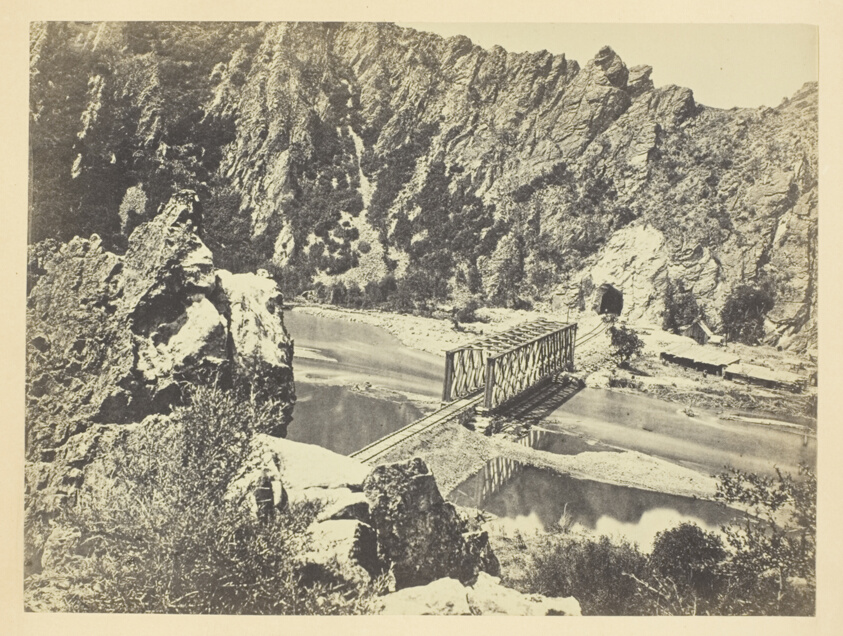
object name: Photograph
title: Tunnel No. 3, Weber Canon, Utah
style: 19th century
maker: Andrew J. Russell; American, 1830–1902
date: 1868/69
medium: Albumen print, pl. XXII from the album "Sun Pictures of Rocky Mountain Scenery" (1870)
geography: United States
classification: photograph; albumen silver print; photography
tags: Collected by Hugh Edwards